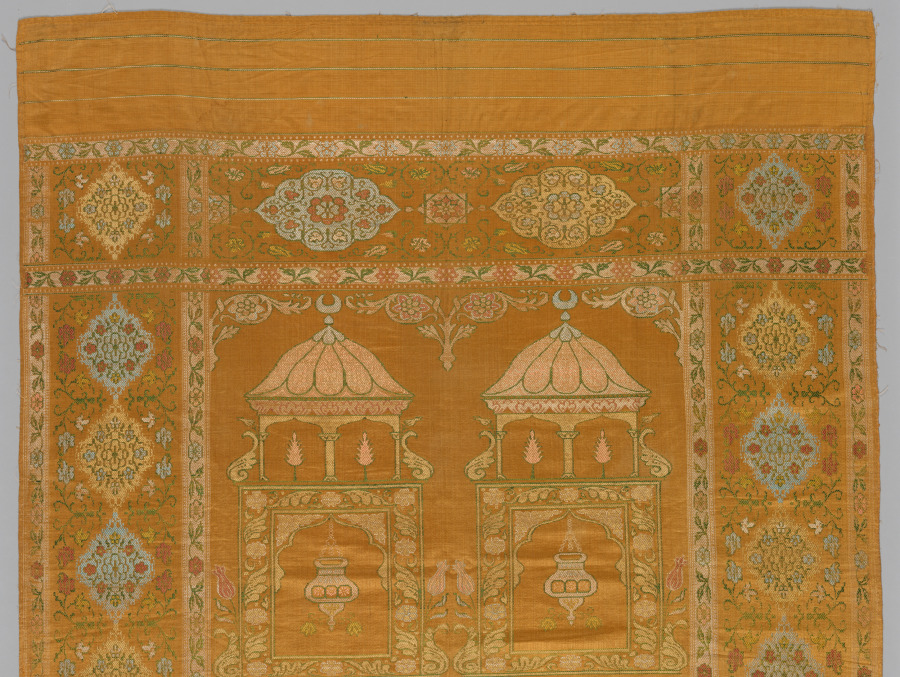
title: Coverlet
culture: Turkey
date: 1800s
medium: silk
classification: Textile